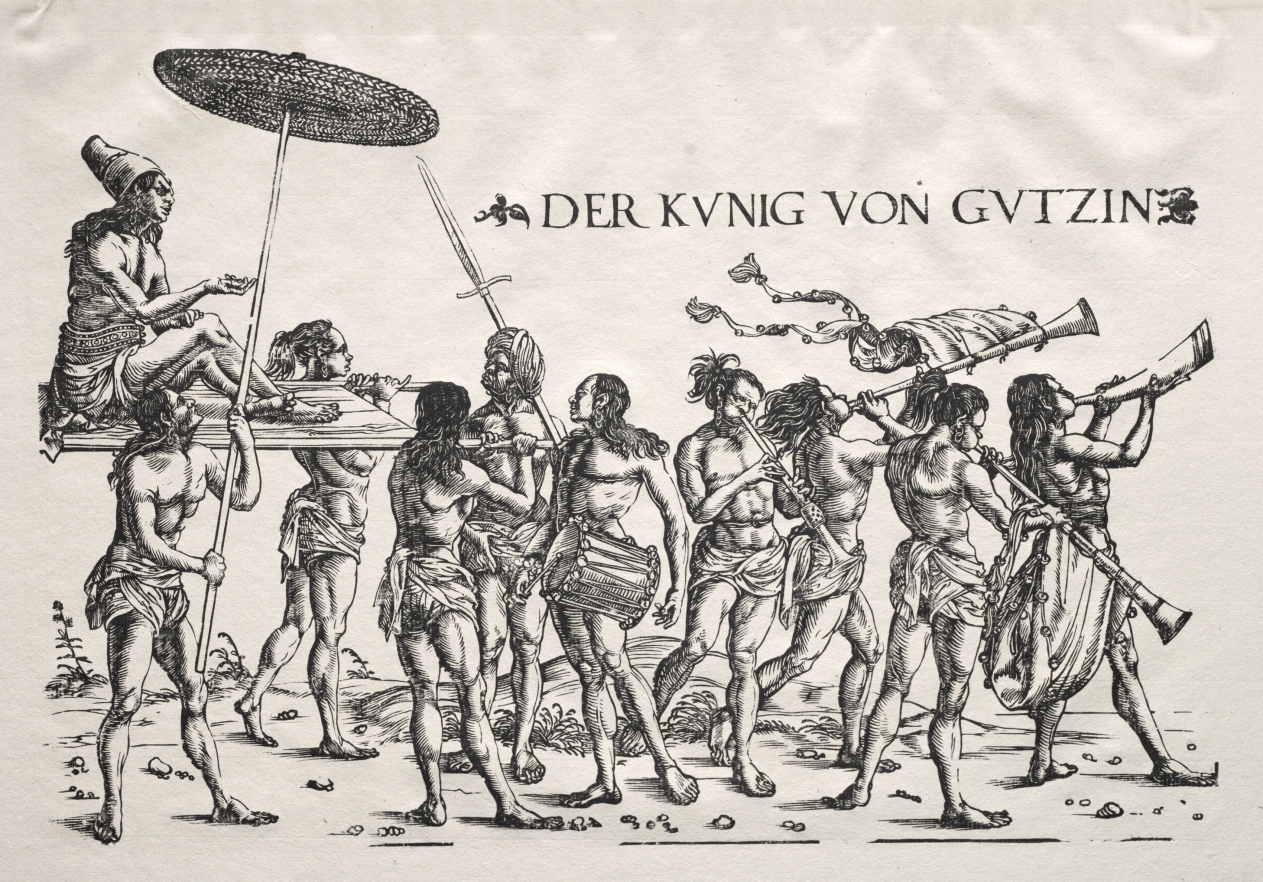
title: The King of Cochin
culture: Germany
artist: Hans Burgkmair (German, 1473–1531)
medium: woodcut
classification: Print